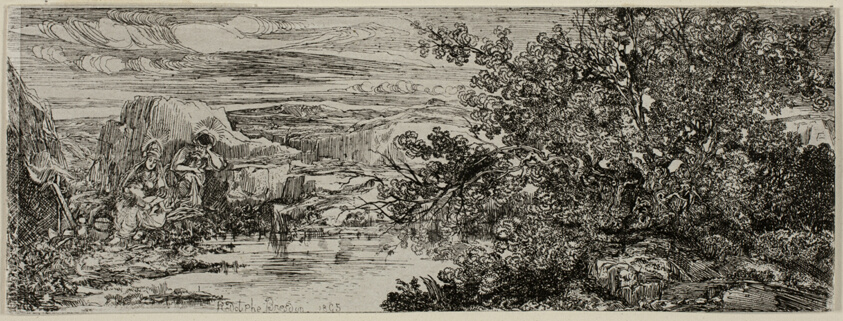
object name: Print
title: The Holy Family beside a Pool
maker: Rodolphe Bresdin (French, 1825-1885)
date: 1865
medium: Etching on white China paper laid down on white wove paper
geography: France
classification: etching; print; prints and drawing